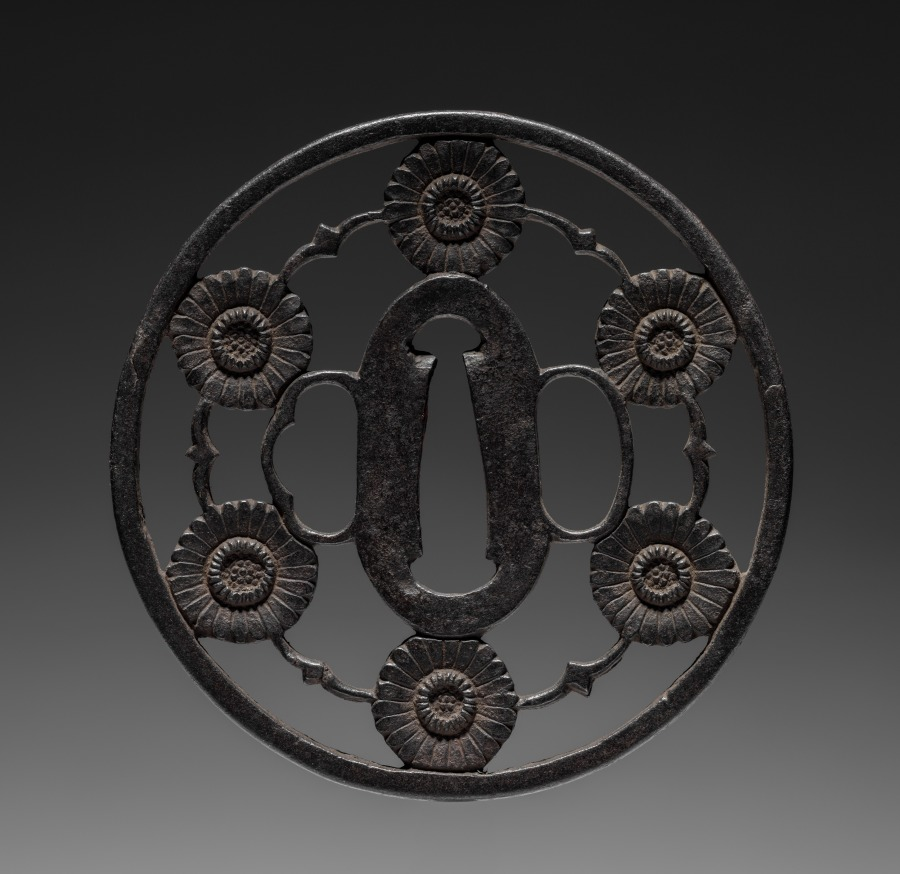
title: Sword Guard (Tsuba) with Flowers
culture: Japan, possibly Edo period (1615-1868)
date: c. 1615–1868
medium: iron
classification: Arms and Armor